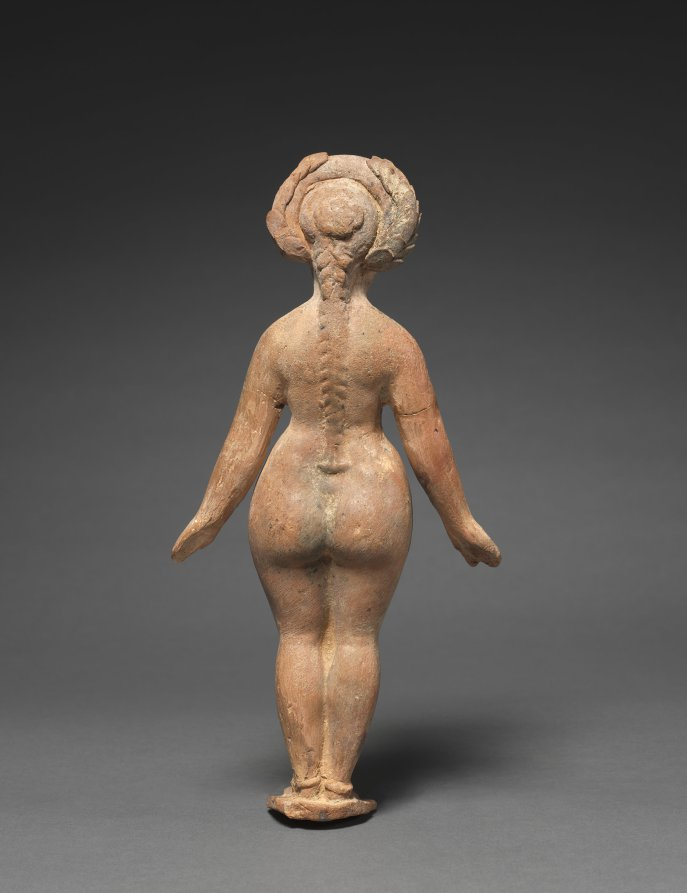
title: Fertility Goddess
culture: Pakistan, Gandhara, reportedly Charsada, early Kushan period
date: 100s CE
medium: terracotta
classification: Sculpture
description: Female figures fashioned from terracotta were found at large man-made pools of water in early Buddhist sacred compounds. They indicate the importance of art and rites associated with fertility and childbirth among the Buddhist laity, of which women were a major component. The wreath, small breasts, and gentle modeling of her full-hipped body associate this figure with Greco-Roman imagery.